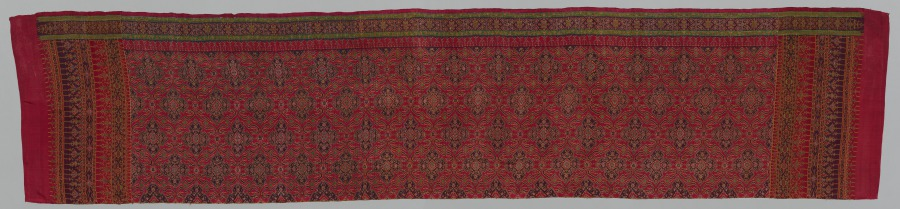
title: Half of a "Sampot" (Skirt Cloth)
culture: Cambodia, 19th - early 20th century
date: 1800s–early 1900s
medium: tabby weave, weft ikat; silk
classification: Textile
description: Ikat-dyed silks from Southeast Asia are weft ikats. Both the technique and the use of silk originated in India and spread to those parts of Southeast Asia that were accessible to international trade. There, it gradually replaced the earlier technique of warp ikat using cotton. The antiquity of this technique in Cambodia is indicated by weft-ikat designs that are preserved on sculptures of the Ankor period (9th-13th centuries). The diagonal lattice pattern in the central field of this textile was common throughout Southeast Asia. Because the textile was inteded to be a skirt cloth, there is little figural representation in its design.